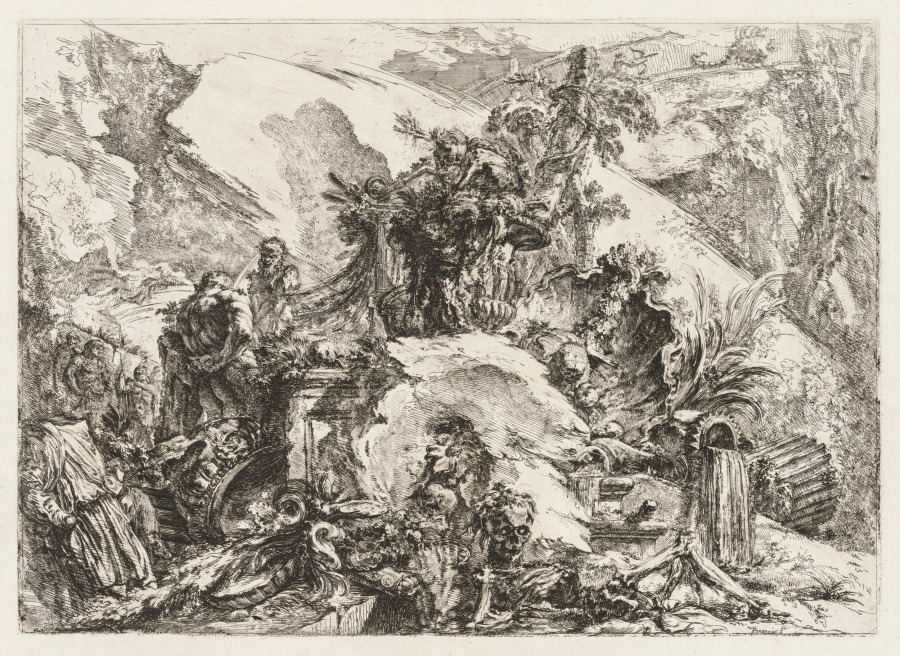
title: The Skeletons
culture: Italy, 18th century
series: Grotteschi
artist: Giovanni Battista Piranesi (Italian, 1720–1778)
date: 1745–50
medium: etching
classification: Print